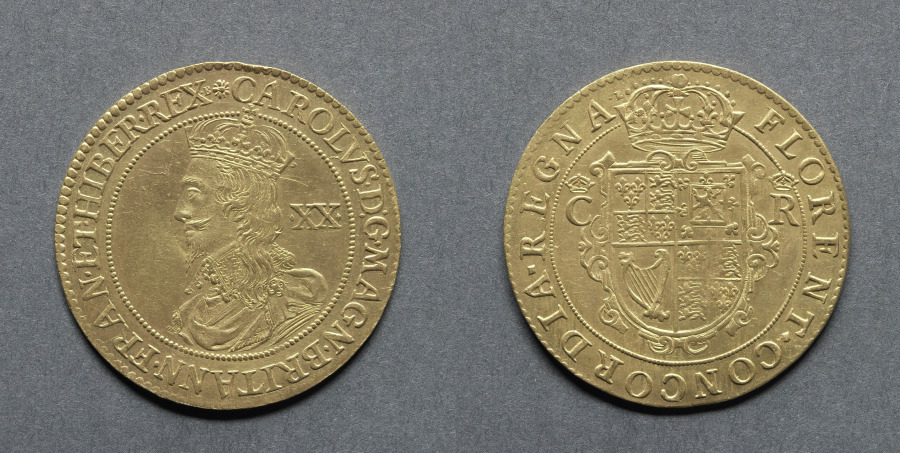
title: Unite: Charles I (obverse); Crowned Shield (reverse)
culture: England, Charles I, 1625-1649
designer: Nicholas Briot (French, c. 1579–1646)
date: 1631–32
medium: gold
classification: Coins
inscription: CAROLVS∙D:G∙MAGN∙BRITANN∙FRAN∙ET∙HIBER∙REX, XX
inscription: FLORENT∙CONCORDIA∙REGNA C R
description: In 1625 Nicholas Briot traveled from Paris and obtained employment in England. In 1628 he was commissioned to design portraits and in 1631 records show that he was working at the Tower Mint. On his first appointment he was authorized to install machines for striking medals. He was formally empowered on February 11, 1629, to extend their use to experiment on coining. The results were scrutinized in 1631 by a royal commission and the following year he was formally appointment as engraver-general in England and had an augmented salary of 300 pounds. From then until 1638 Briot minted a small fraction of the gold and silver coin by machine. By means of the even pressure of the screw press on a rolled planchet obtained from the rolling mill, and by a collar that kept the metal from flowing unevenly, Briot was able to produce a neat round coin. His fame, however, is that he was the finest die-cutter England had known since Alexander of Brugsal engraved the famous profile portrait of Henry VIII (1485–1509). Like Eloy Mestrelle (1561), Briot met with great opposition from his co-workers, but because of his great artistic ability he was backed by King Charles I and no one could displace him. During the English Civil War he was retained by the Tower, but his influence can be seen in some of the coins struck at Oxford and York, and he also worked in Scotland on some of the Scottish coins. He died in 1646, four years after the war had started.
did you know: This was the first coin milled or produced by machine in England, previously all issue was hand struck.